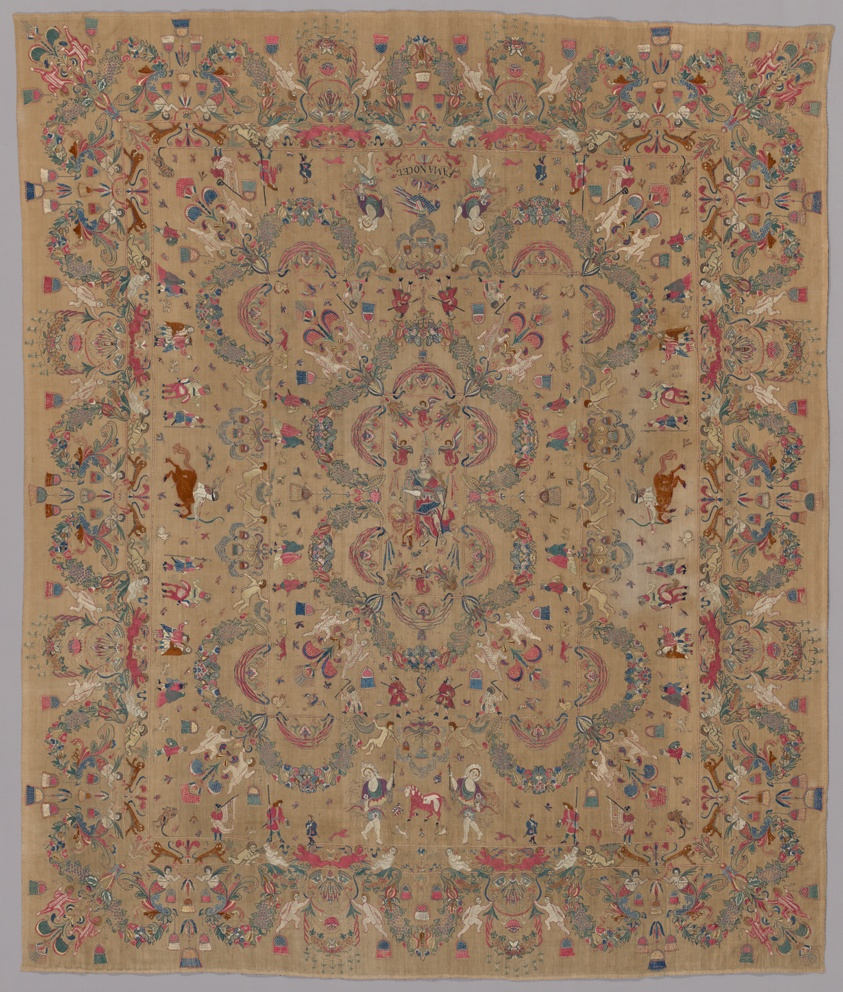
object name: Coverings and Hangings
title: Embroidery with Allegorical and Mythological Motifs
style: peruvian, 17th Century, latin american, colonial Peru, south american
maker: Peru, probably Lima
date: 1660s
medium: Silk embroidery on cotton foundation textile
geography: South America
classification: embroidery; textile; ceremonial object; needlework (visual works)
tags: mythological figures, warriors, robes, lions, female figures, bows and arrows, archers, ceremonial objects, power